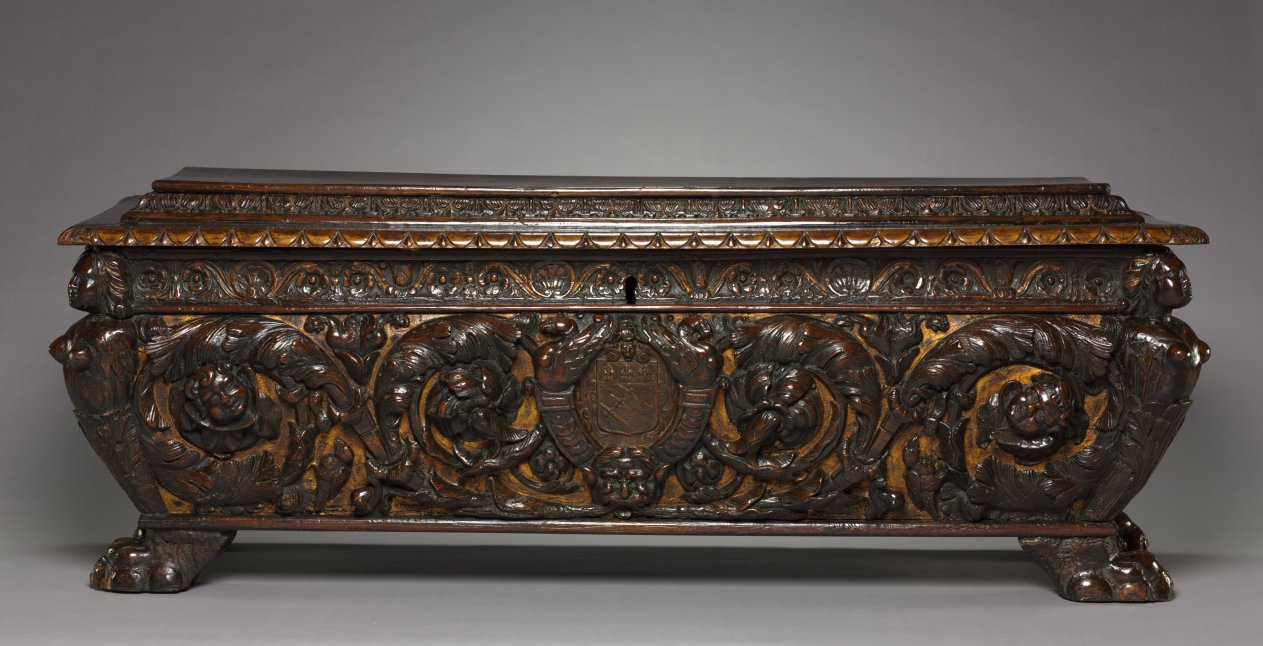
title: Marriage Chest (Cassone)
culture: Italy, early 16th century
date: early 1500s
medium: walnut with traces of gilding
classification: Furniture and woodwork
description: Large storage chests resembling ancient Roman burial vaults-a popular collectible among wealthy families during the Renaissance-were often associated with an important marriage and contained the wife’s dowry of clothes and precious objects. This particular example displays the arms of the Spada Family of Rome amidst a richly carved façade on a gilded ground. Sometimes cassoni were carried in the marital procession from the bride’s home to that of her future husband, emphasizing the power and wealth of both families.